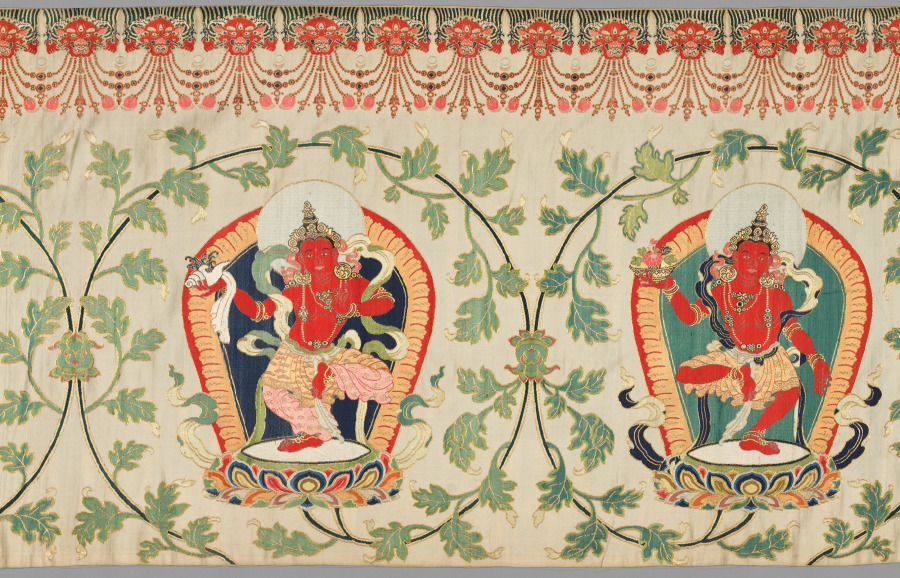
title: Brocaded Strip, known as "Imperial Tribute Brocade"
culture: China, Qing dynasty (1644-1911)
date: c. 1770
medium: brocaded satin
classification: Textile